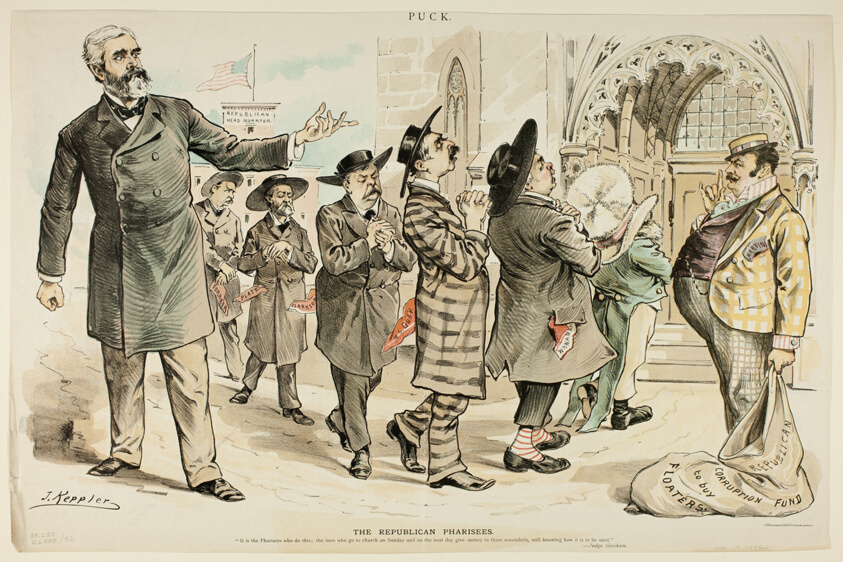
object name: Print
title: The Republican Pharisees, from Puck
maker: Joseph Keppler (American, 1838-1894)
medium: Color lithograph on newsprint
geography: United States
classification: lithograph; print; prints and drawing